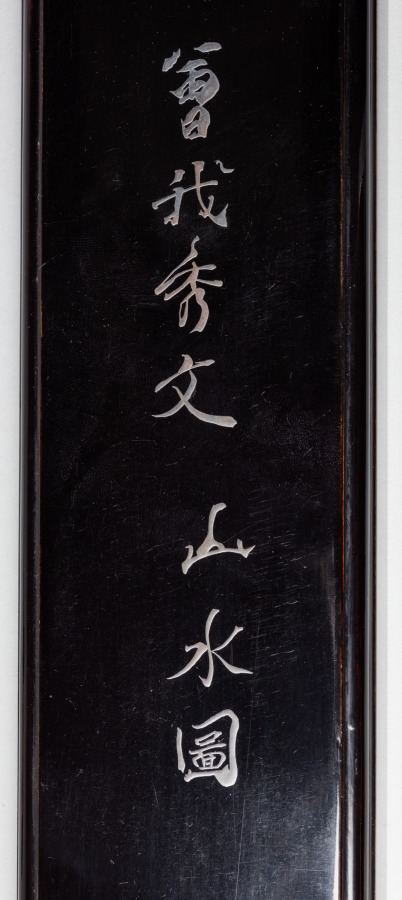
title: Landscape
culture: Japan, Muromachi period (1392–1573)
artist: Judō (Japanese, active 16th century)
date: 1500s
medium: hanging scroll, ink and light color on paper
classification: Painting